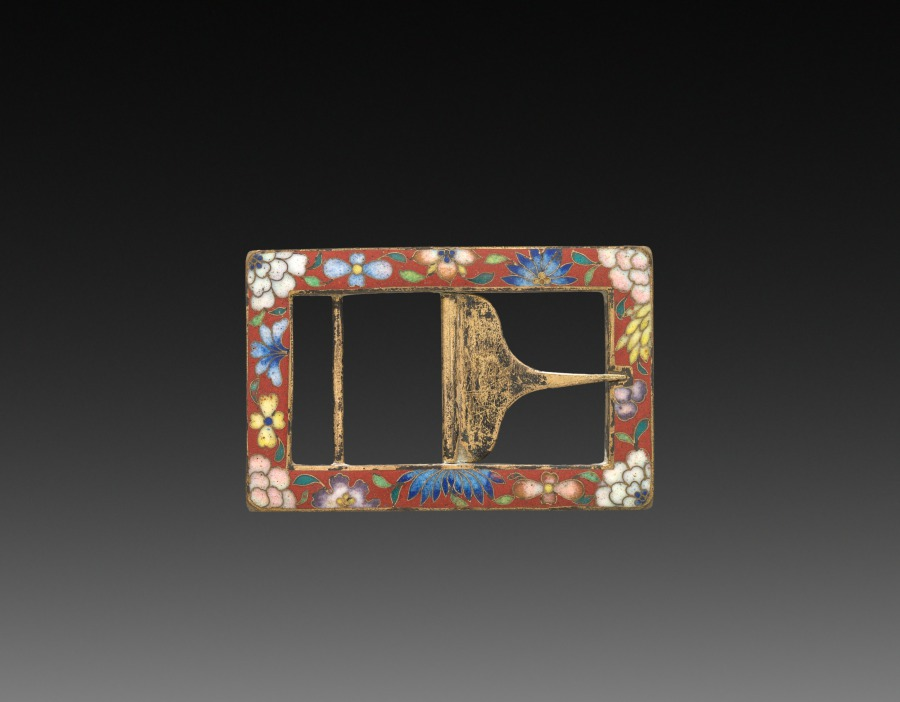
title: Cloisonne Belt Buckle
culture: Japan, Meiji period (1868–1912) to Taishō period (1912–26)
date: early 1900s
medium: cloisonne enamel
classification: Enamel